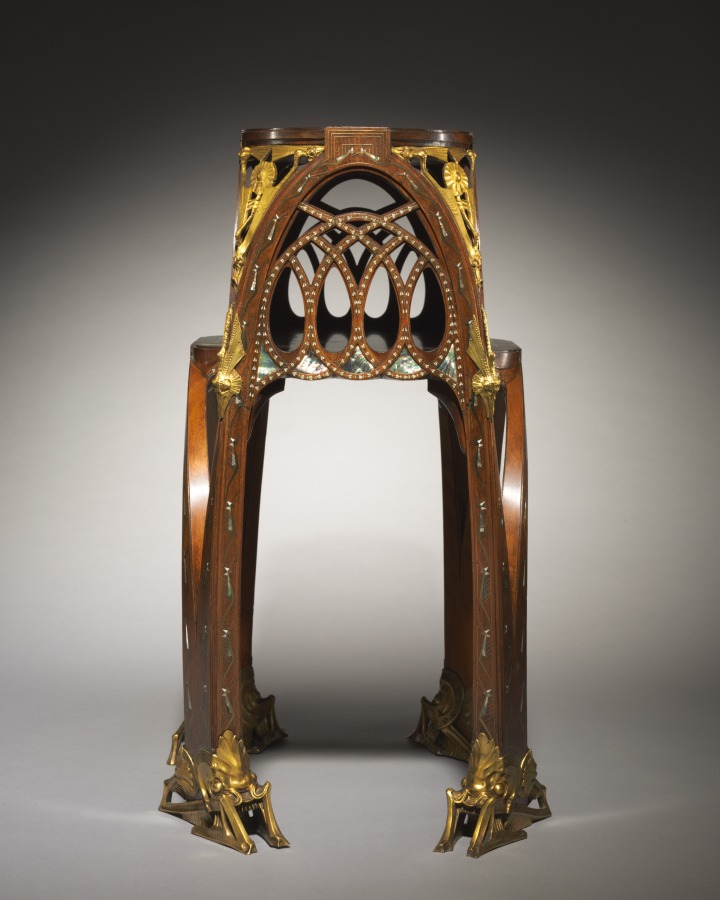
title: Tea Table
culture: France, Paris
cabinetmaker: Carlo Bugatti (Italian, 1856–1940)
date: c. 1907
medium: inlaid wood (mahogany?), cast and gilded bronze mounts, inlays of ivory or bone, metal, and mother-of-pearl (marine mussels or pearl oysters)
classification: Furniture and woodwork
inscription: signed in ligature in white metal inlay on central shelf: Bugatti.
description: Luxurious materials might catch the eye first, but a closer look reveals the imaginary creatures that adorn the surface of this table. Featuring elaborate arches, a favorite motif that appeared throughout Bugatti's furniture, this fantastical imagery is a window into the designer's expressive imagination.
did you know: Carlo Bugatti's sons achieved illustrious careers of their own. Rembrandt Bugatti (1884-1916) became a celebrated sculptor, and Ettore Bugatti (1881-1947) manufactured luxurious automobiles and racing cars.